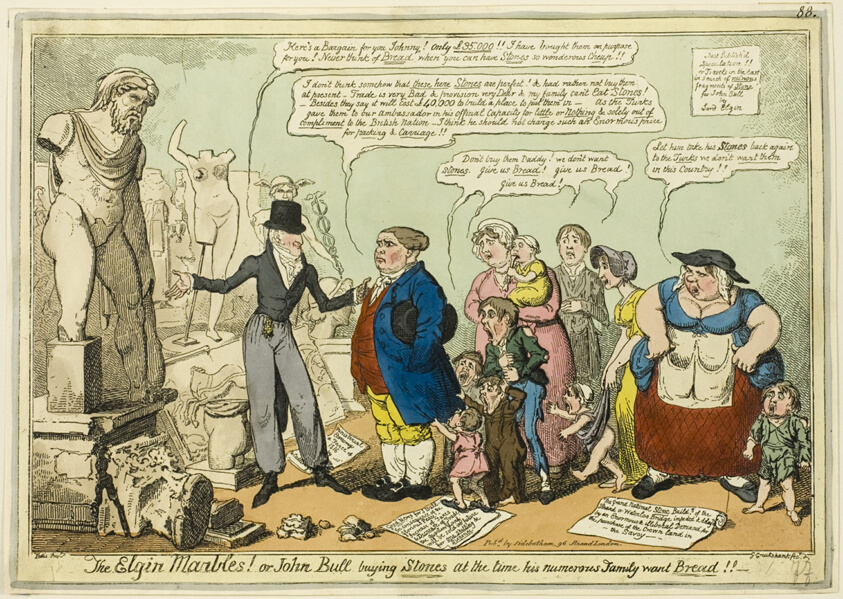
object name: Print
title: The Elgin Marbles!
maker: George Cruikshank (English, 1792-1878); published by J. Sidebotham (English, active 1802-1820)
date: published c. June 1816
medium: Hand-colored etching on paper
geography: England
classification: etching; print; prints and drawing